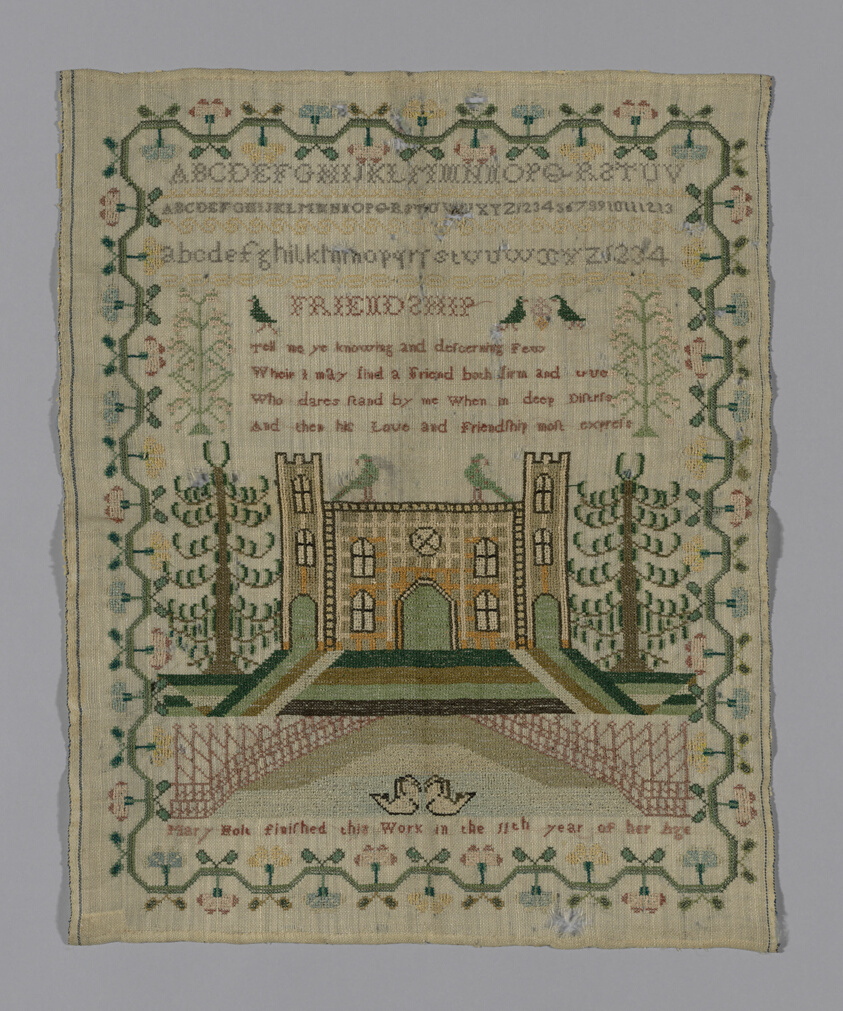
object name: Textile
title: Sampler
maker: Mary Holt (England or United States)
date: 19th century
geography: England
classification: textile; sampler; needlework (visual works)